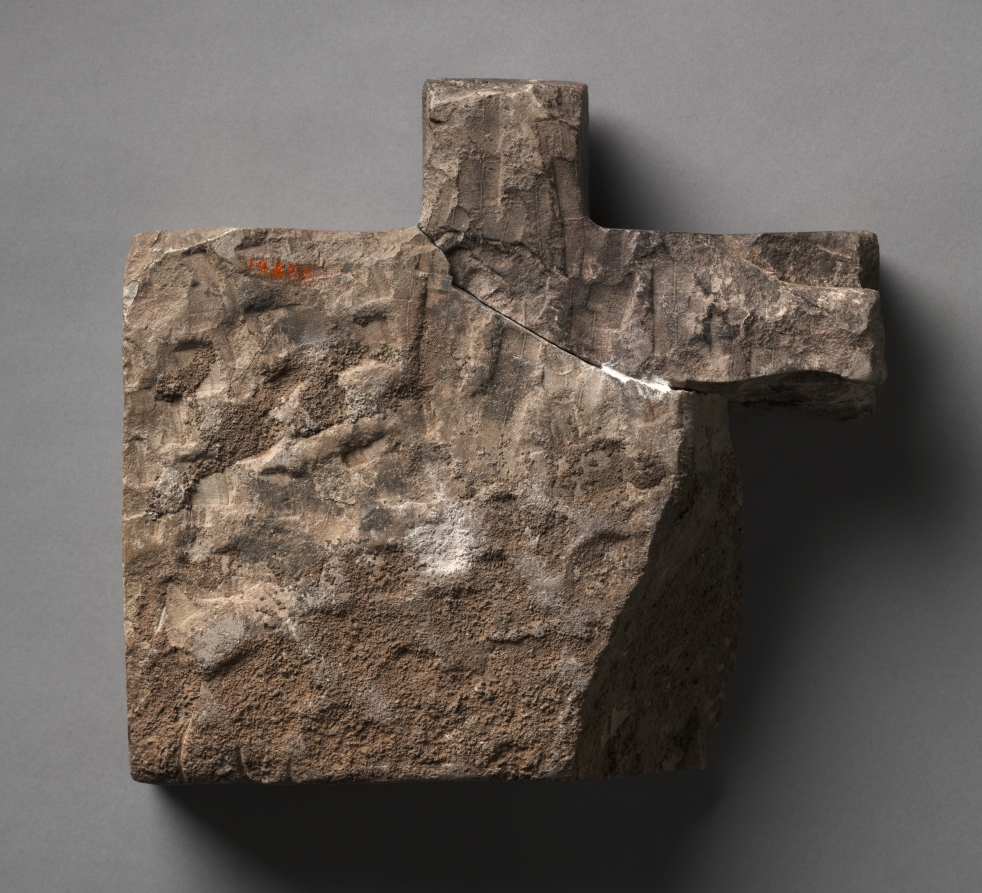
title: Offering Table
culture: Egypt, probably Thebes, New Kingdom (1540–1069 BCE) or later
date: 1069–656 BCE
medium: limestone, originally painted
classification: Sculpture